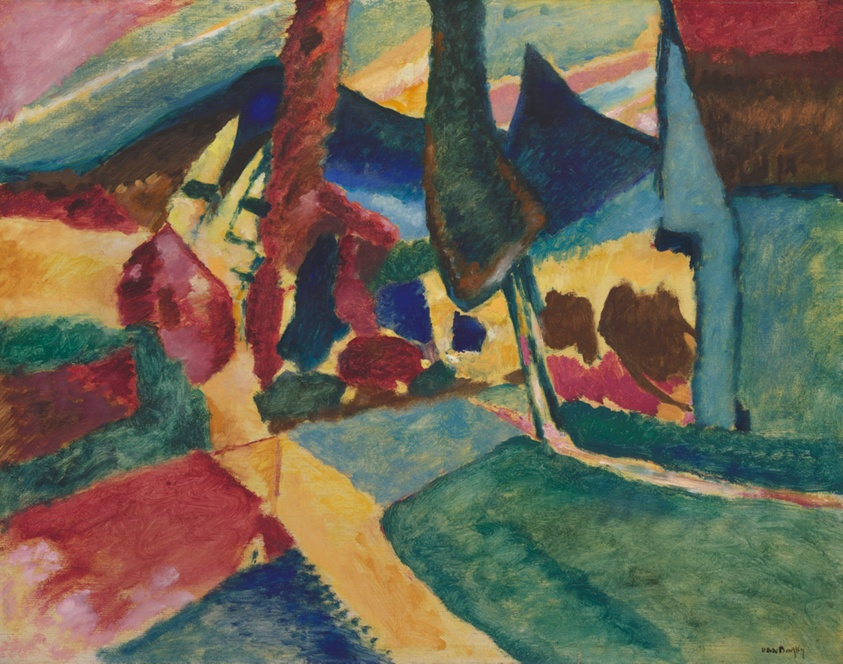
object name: Painting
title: Landscape with Two Poplars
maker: Vasily Kandinsky (Born Moscow (formerly Russian Empire, now Russia), 1866; died Neuilly-sur-Seine, France, 1944)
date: 1912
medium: Oil on canvas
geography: Germany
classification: painting; modern and contemporary art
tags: Century of Progress, houses, world's fairs, Chicago World's Fairs, mountains, plants, poplar trees, trees